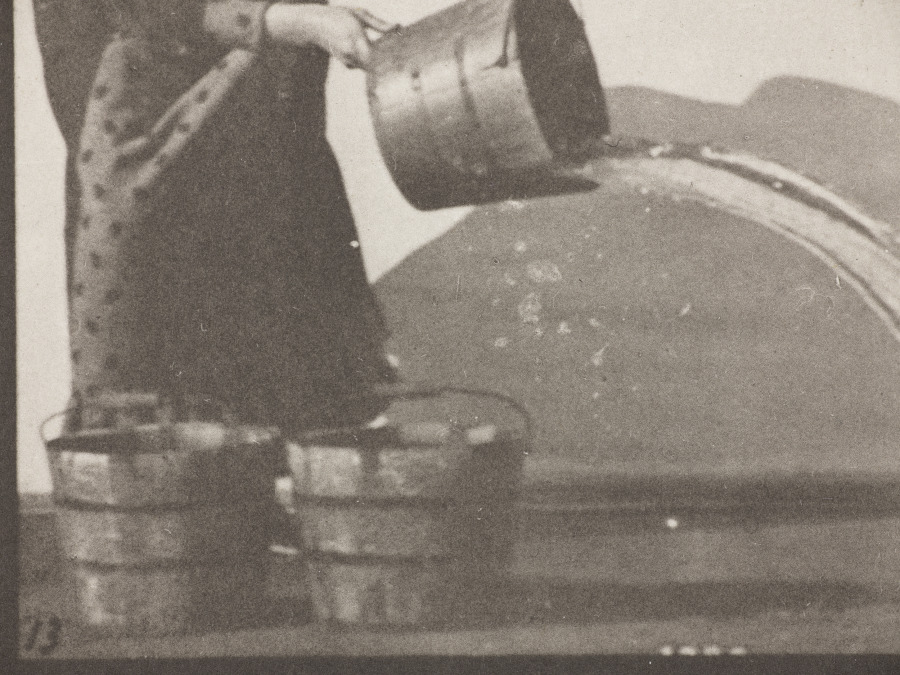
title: Emptying a Bucket of Water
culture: America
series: Animal Locomotion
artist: Eadweard J. Muybridge (American, 1830–1904)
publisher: University of Pennsylvania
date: 1887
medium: collotype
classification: Photograph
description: Eadweard J. Muybridge initially used horses to capture motion as separate slices of time faster than the human eye could perceive them, then moved on to study other animal and human movements. Everyday activities, like emptying a bucket of water, were broken down and sequenced back-to-back. This series was commissioned by the University of Pennsylvania and intended to diagnose dysfunction in human movement by allowing each consecutive action to be studied in isolation. The university’s desire for distribution called for the use of collotype. The process had been recently improved to the point where editions of up to 1,000 were possible, making it an attractive option for publishers.